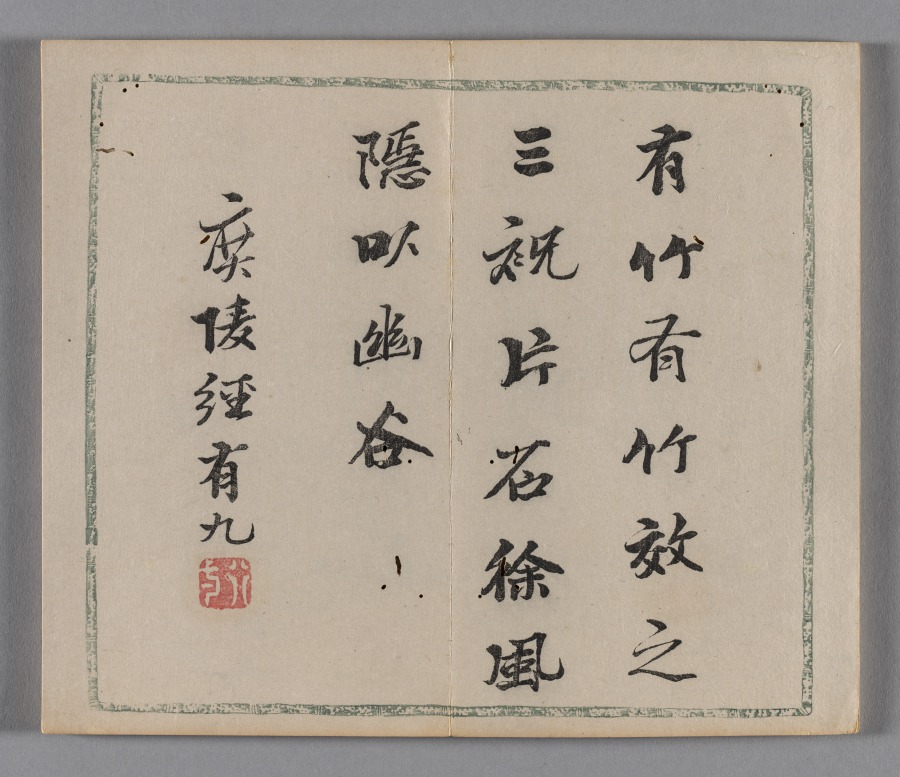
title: Ten Bamboo Studio Painting and Calligraphy Handbook (Shizhuzhai shuhua pu): Round Fans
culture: China, Qing dynasty (1644-1911)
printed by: Hu Zhengyan (Chinese, c. 1584–1674)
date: 1633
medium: Woodblock-printed book; ink and colors on paper; first edition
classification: Print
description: Color printing reached a level of perfection in the early 1600s, as seen in this Ten Bamboo Studio Collection of Calligraphy and Painting and the Mustard Seed Garden Manual of Painting (printed 1679 and 1701). The painterly quality, precision in registering (aligning) the woodblocks, and harmonious colors made them the most successful color print editions in Chinese history. Both editions were printed and compiled in Nanjing, spread nationwide, and had a great impact on the arts in Japan and Korea.